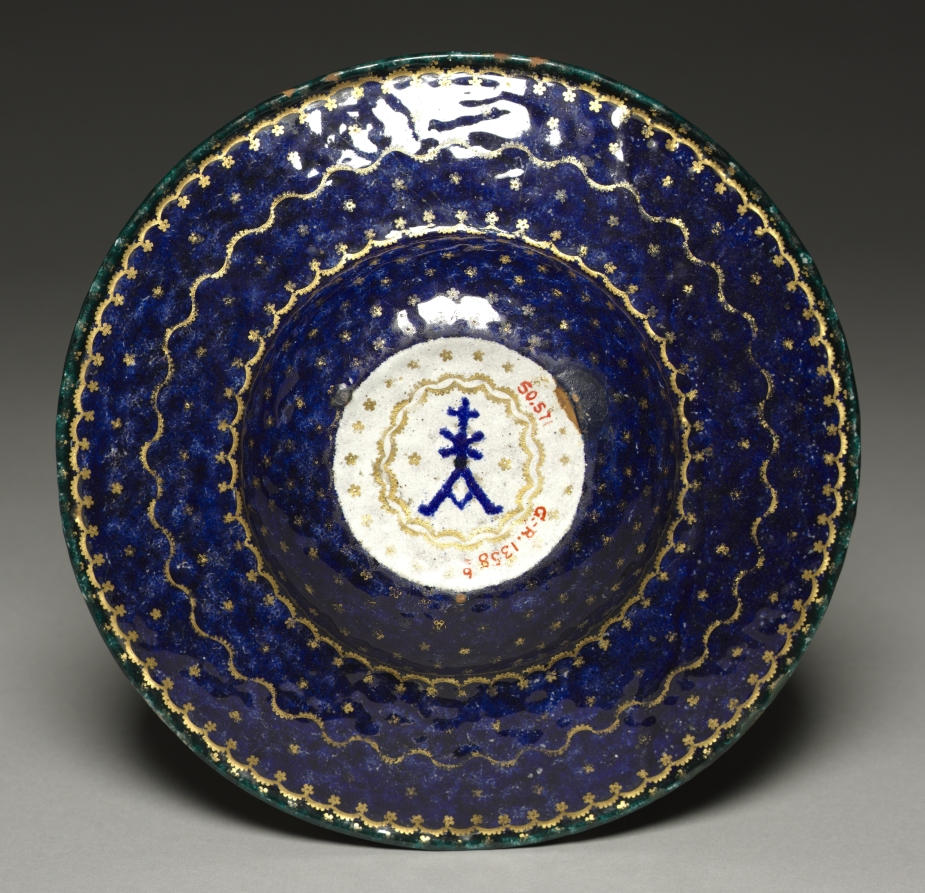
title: Dish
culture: Italy, Venice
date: late 1400s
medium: painted enamel on copper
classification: Enamel